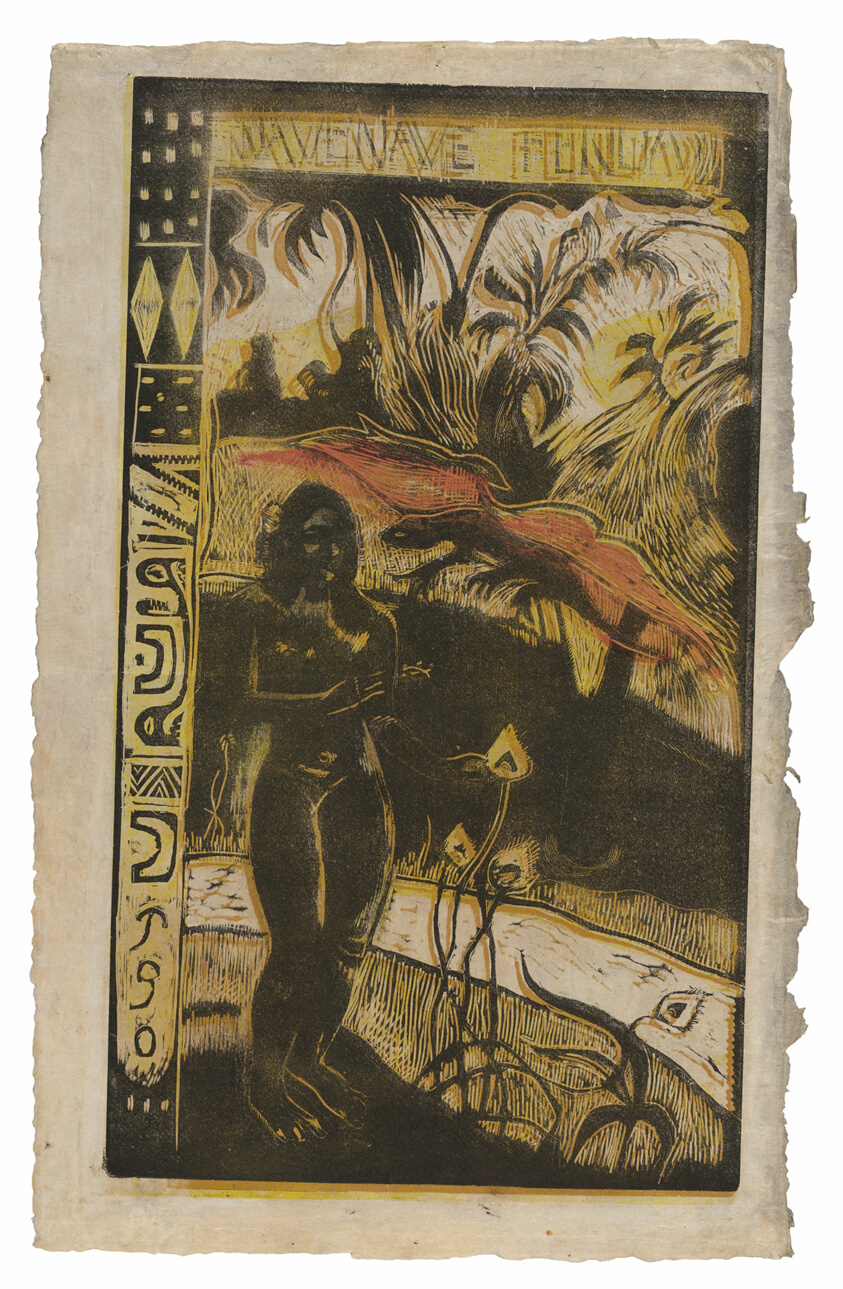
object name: Print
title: Nave nave fenua (Delightful Land), from the Noa Noa Suite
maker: Paul Gauguin (French, 1848-1903)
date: 1893–94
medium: Wood-block print, printed twice in yellow ocher and black inks, over a yellow ink tone block, and stenciled red oil medium, on cream Japanese paper discolored to a grayish tone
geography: France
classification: woodcut; print; prints and drawing